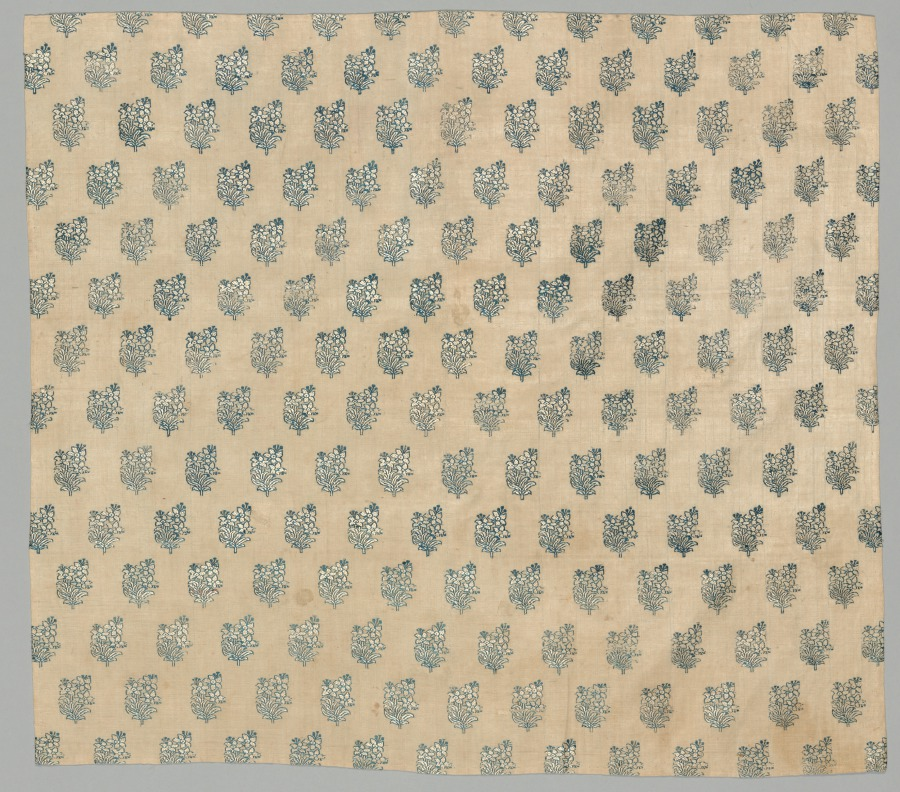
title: Brocade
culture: India, Surat, 18th-19th century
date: 1700s - 1800s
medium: brocade, "himru"; cotton and silk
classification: Textile